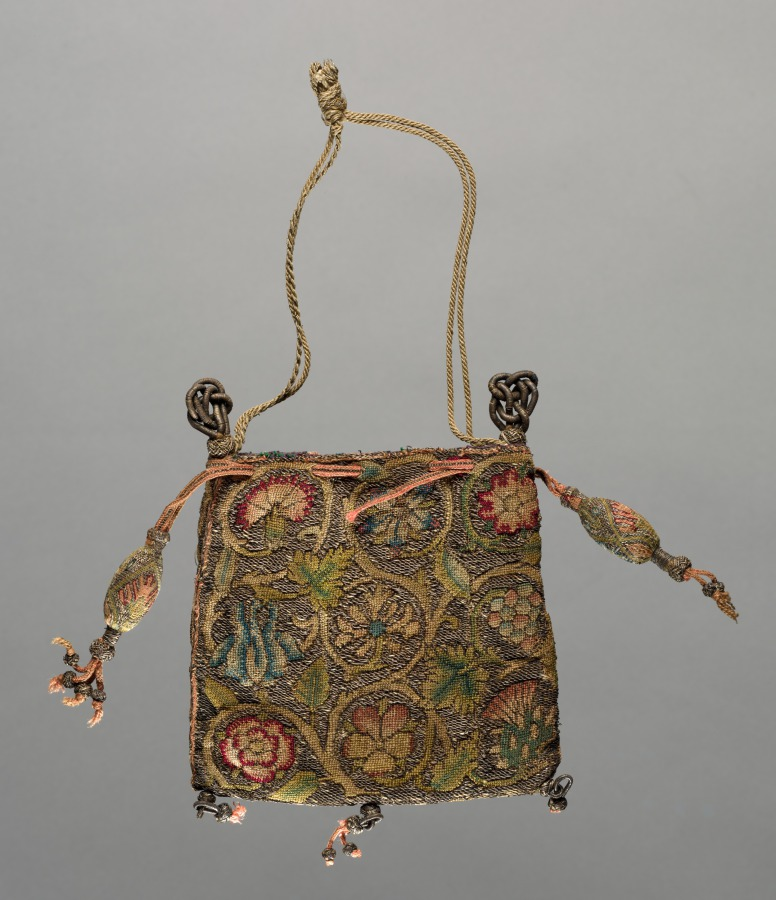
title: Purse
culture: England, early 17th century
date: early 1600s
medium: embroidery; silk and silver filé on linen ground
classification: Embroidery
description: According to Elizabethan embroidery scholar Jacqui Carey, the scale and construction of this purse and its trimmings are typical of a so-called ‘sweet bag’, a container for sweet-smelling substances. This term was popularized in George Wingfield Digby’s 1963 publication on Elizabethan embroidery; Digby used the term to describe small English purses dating from the 1500s and 1600s. In CMA’s example, the handle and lining look to be later replacements. The embroidery is worked on an open plain weave linen fabric with silk in a range of colors and silver metal thread (thin metallic strips wrapped around a white silk core). In places, the inked design is visible on the linen. The stitches used for the purse’s background are unusual in that they lie horizontally rather than vertically. The rectangle of embroidered fabric was folded along the base and stitched together up the sides. Ten holes are pierced through the embroidered fabric near the top edge of the purse. Two drawstrings, terminating in ornate tassels, are threaded through the holes. The nine floral motifs-- carnation, borage, rose, columbine, honeysuckle, grapes, rose, pansy and thistle—set within coiling stems and foliage are typical of the period. Two embroidery stitches were used, tent stitch and Elizabethan ground stitch.